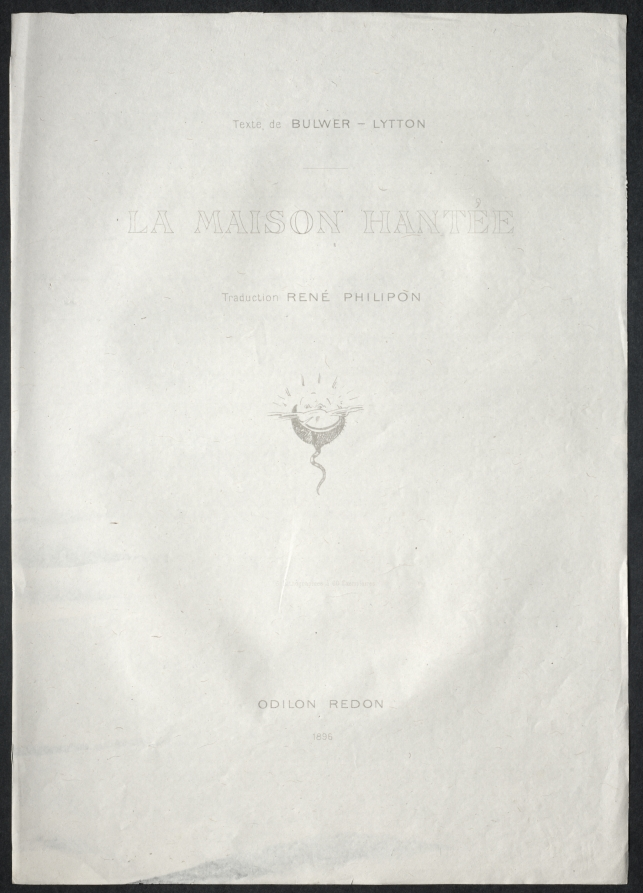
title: Title Plate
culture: France, late 19th Century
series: The Haunted House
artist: Odilon Redon (French, 1840–1916)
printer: Auguste Clot (French, 1858–1936)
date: 1896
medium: lithograph on wove paper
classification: Print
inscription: printed, from top center: Texte de BULWER-LYTTON / LA MAISON HANTÉE / Traduction RENÉ PHILIPON / 6 Lithographies à 60 Exemplaires / ODILON REDON / 1896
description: Odilon Redon was a voracious reader of contemporary literature, and such texts often influenced his art. This series was inspired by The Haunted and the Haunters, an 1859 novel by British writer Edward Bulwer-Lytton. Redon’s prints capture the book’s mysterious tone and emphasis on the supernatural through vague but evocative imagery that sometimes borders on abstraction. By this time a seasoned expert in lithography, the artist collaborated with master printer Auguste Clot. Their combined technical skills allowed for the rich tonal variation seen here, made by turning Redon’s lithographic crayon on its side, layering various marks, and even scratching directly into the surface of his stone.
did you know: One of Redon's greatest patrons, the occultist René Philipon, commissioned this portfolio as a supplement for his French translation of Bulwer-Lytton's The Haunted and the Haunters.